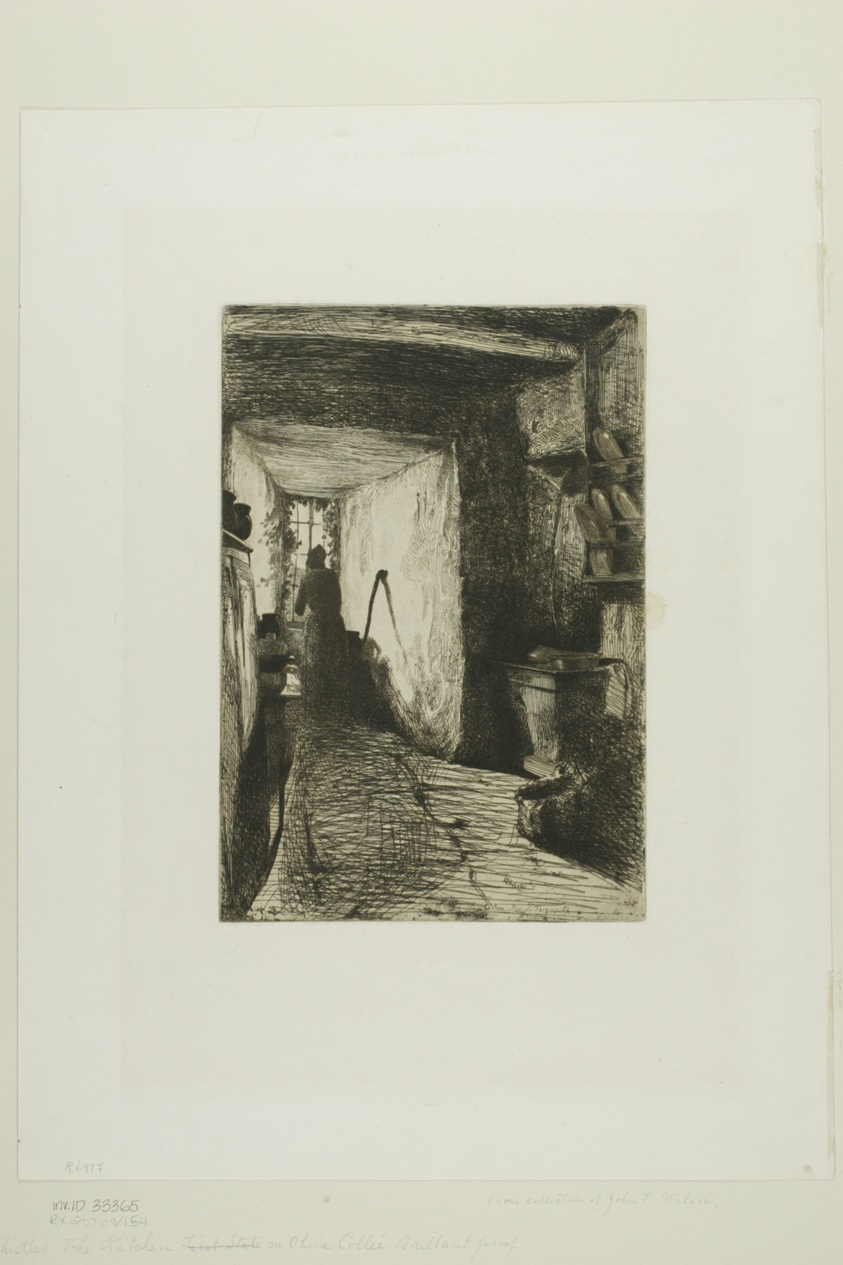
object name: Print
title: The Kitchen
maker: James McNeill Whistler (American, 1834-1903)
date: 1858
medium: Etching with foul biting in black ink on ivory China paper, laid down on white wove paper (chine collé)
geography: United States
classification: etching; foul biting; print; prints and drawing; paper